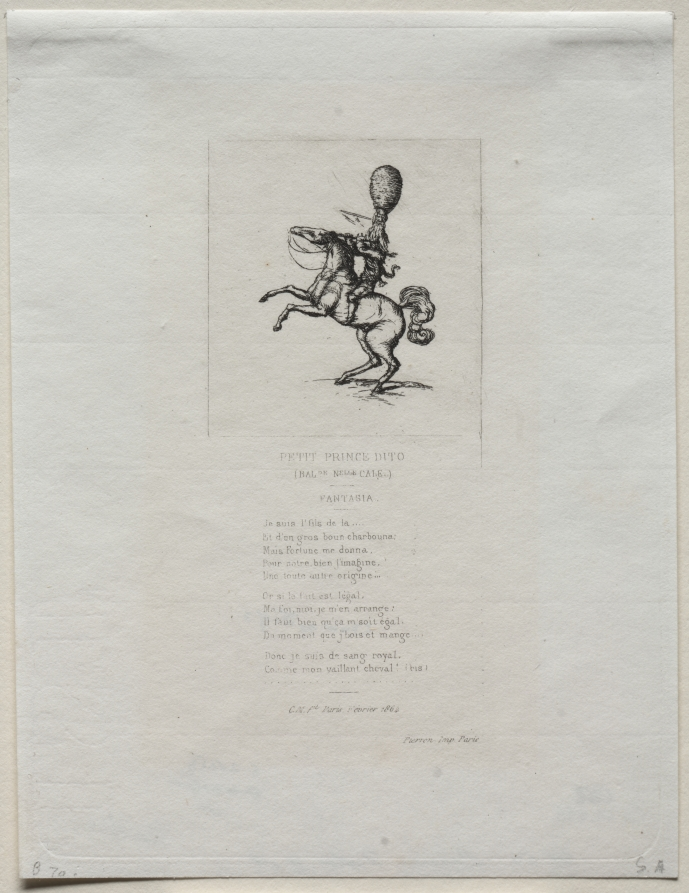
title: Little Prince Dito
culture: France, 19th century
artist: Charles Meryon (French, 1821–1868)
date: 1864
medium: etching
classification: Print